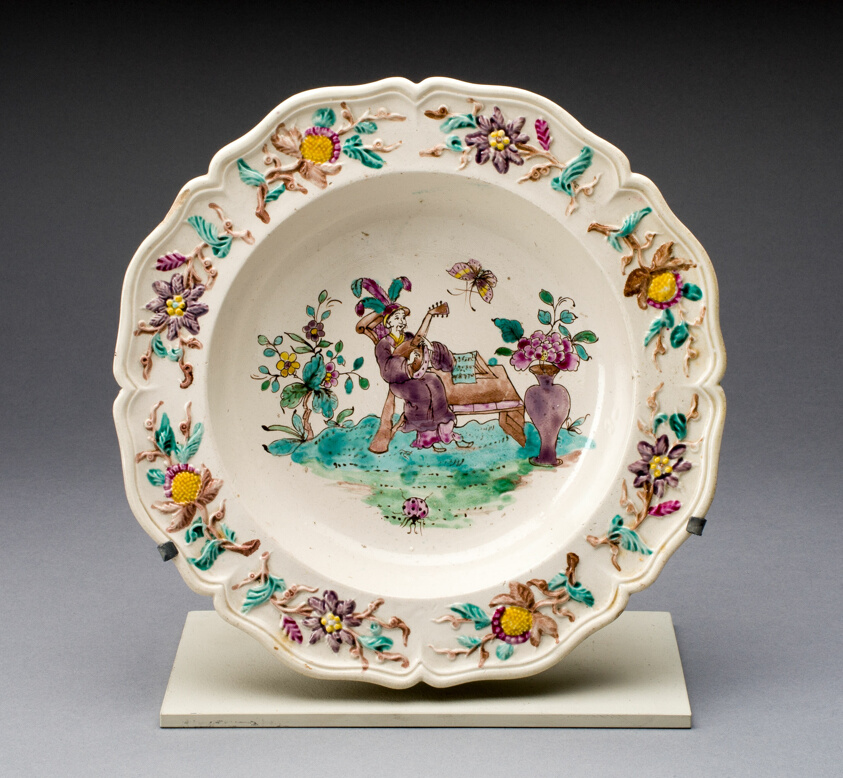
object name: Ceramics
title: Soup Bowl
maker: Staffordshire, England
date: c. 1760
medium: Salt-glazed stoneware, polychrome enamels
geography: Staffordshire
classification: bowl; ceramics; stoneware; dish (vessel); european decorative arts; salt-glazed stoneware